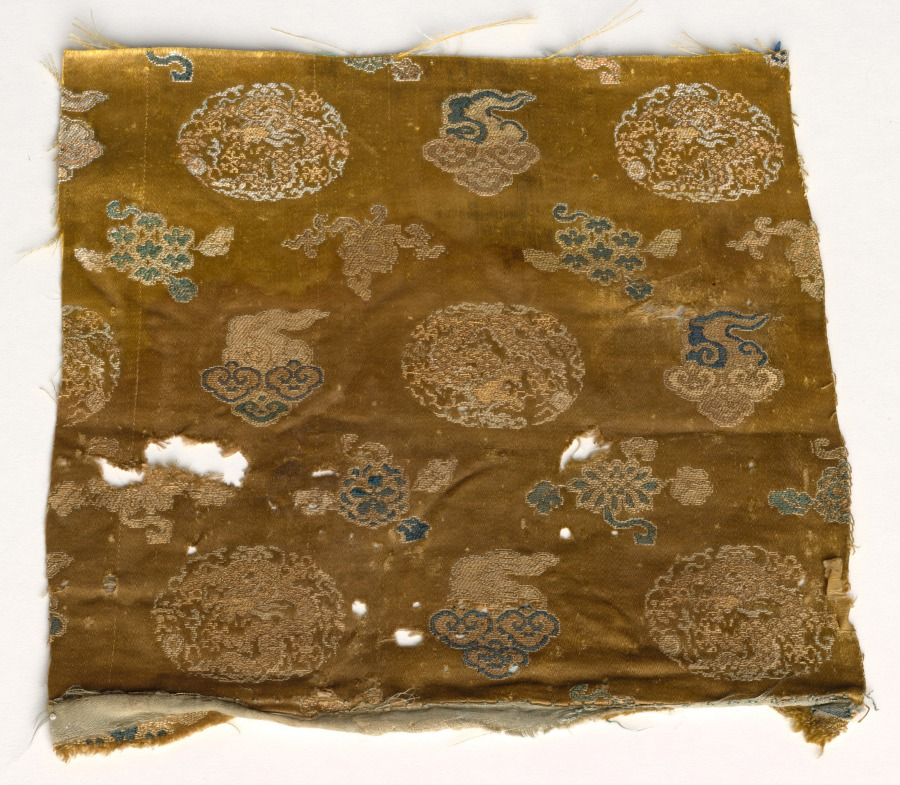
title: Fragment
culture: China, 18th century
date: 1700s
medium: brocaded satin, silk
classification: Textile